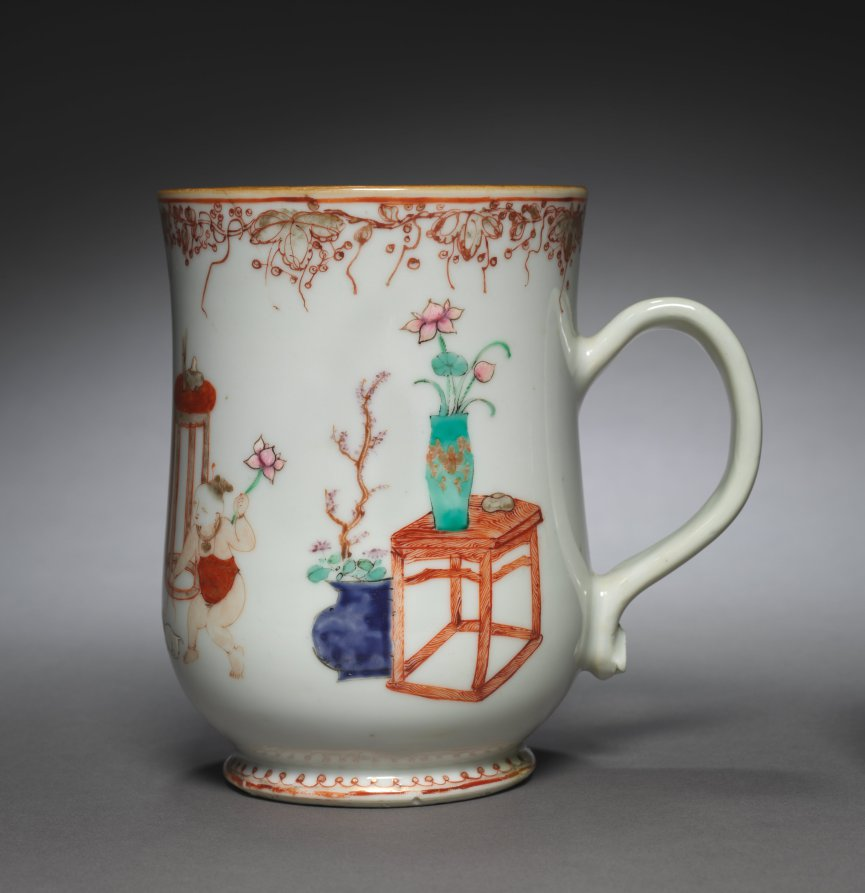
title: Tankard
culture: England, 18th century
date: 1765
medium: ceramic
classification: Ceramic